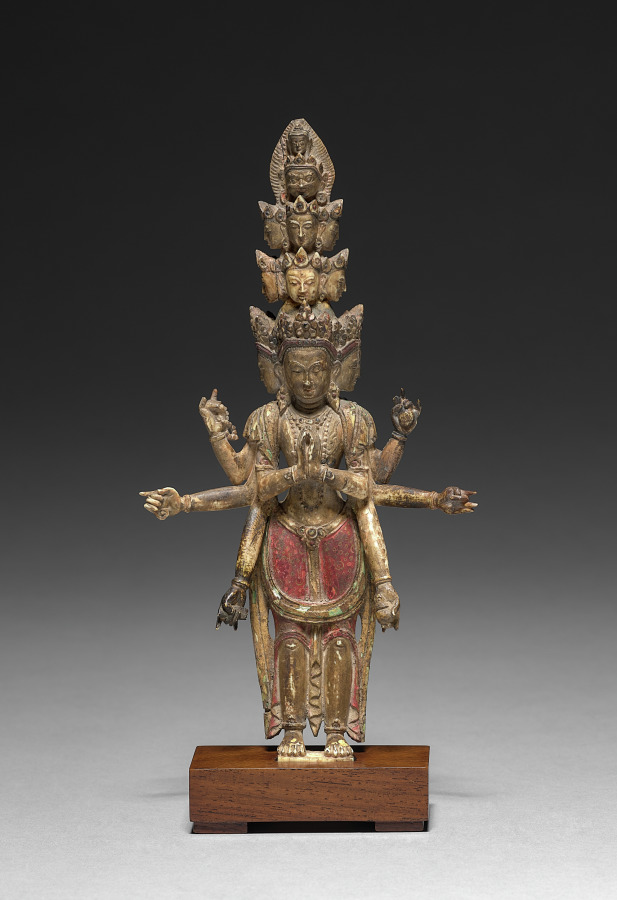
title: Eleven-Headed Avalokitesvara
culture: Nepal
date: 1500s–1600s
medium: painted ivory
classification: Ivory